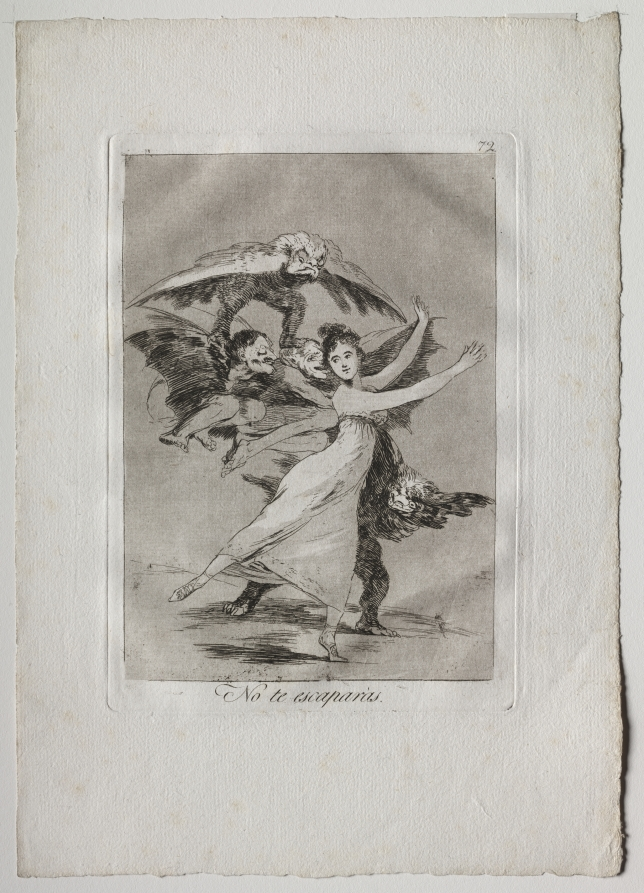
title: You Will Not Escape, Plate 72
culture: Spain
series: Los Caprichos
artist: Francisco de Goya (Spanish, 1746–1828)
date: 1799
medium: etching and aquatint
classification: Print